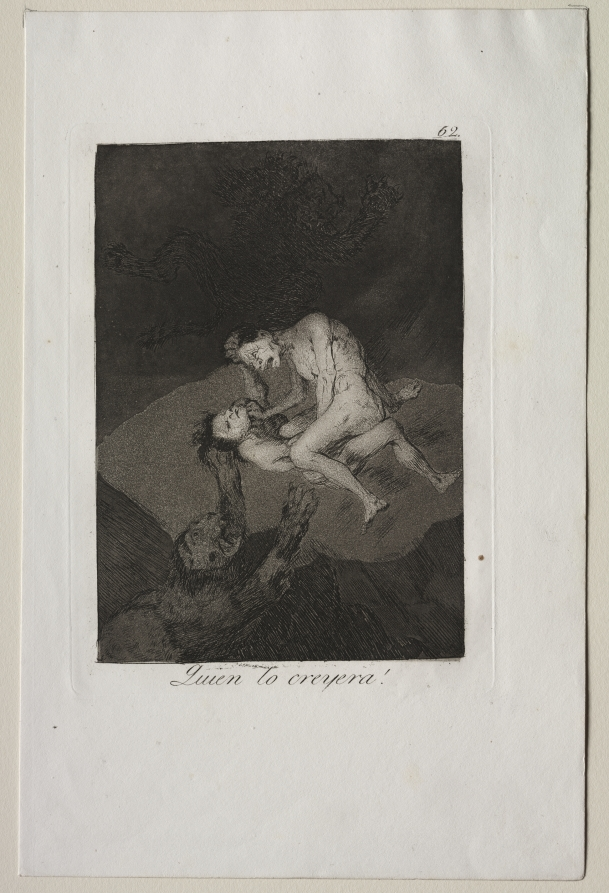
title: Who Would Have Thought It!, Plate 62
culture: Spain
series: Los Caprichos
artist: Francisco de Goya (Spanish, 1746–1828)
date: 1799, printed c. 1855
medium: etching and aquatint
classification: Print